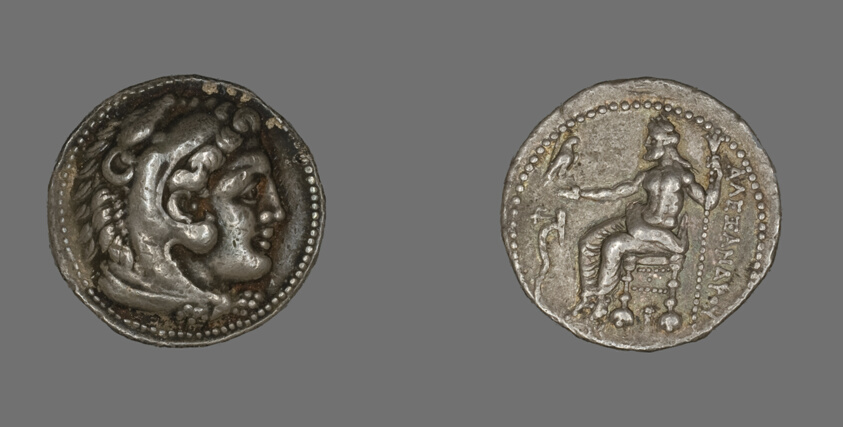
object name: Coin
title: Tetradrachm (Coin) Portraying Alexander the Great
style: greek, ancient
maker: Greek, minted in Cilicia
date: 336-323 BCE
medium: Silver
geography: Greece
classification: coin; ancient art